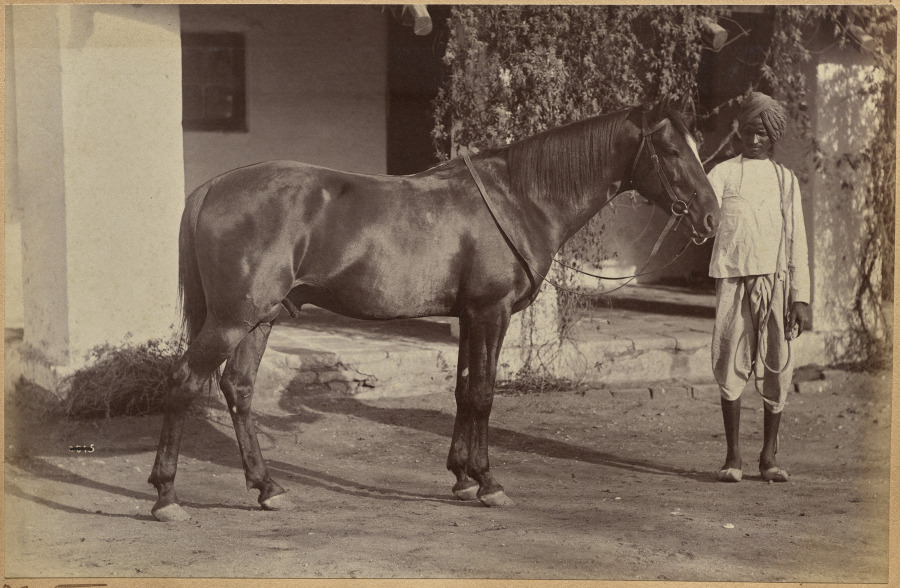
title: Captain Bailward's horses (recto, bottom)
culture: India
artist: Raja Deen Dayal (Indian, 1844–1905)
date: c. 1882–87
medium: albumen print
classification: Photograph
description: These photographs are part of an album, now disassembled, of around 105 photographs taken in India between 1885 and summer 1887 that provide glimpses into the lives of the British colonial elite and royal and upper-class Indians. The museum holds another group of 37 pictures from this album (2016.266), which was probably commissioned by a British civil servant visiting or working in India around 1888 as a personal souvenir of his experiences there.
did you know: Raja Deen Dayal is regarded now, and was considered during his lifetime, to be India’s most important 19th-century photographer.